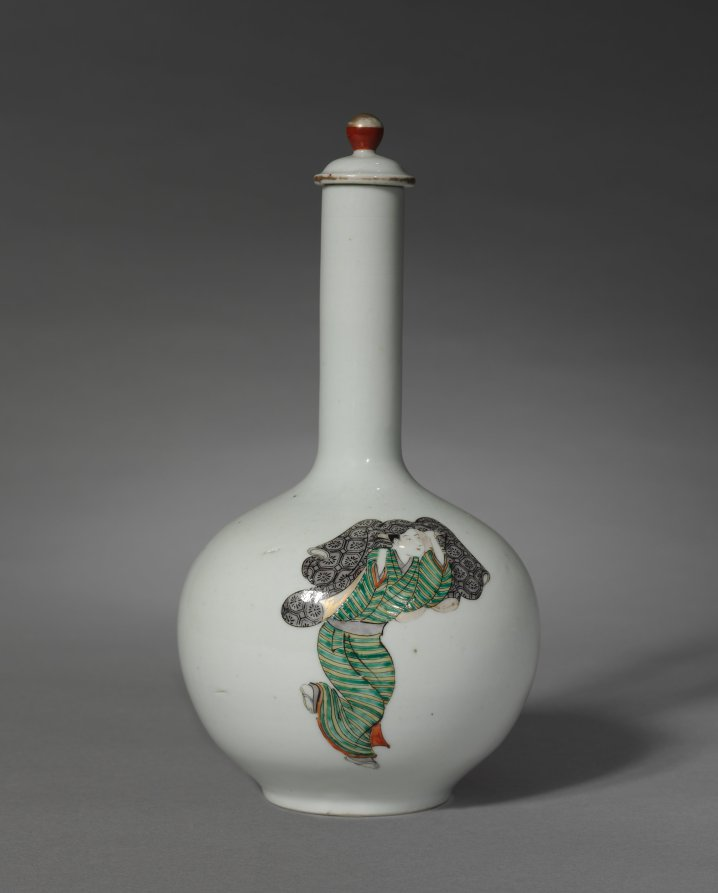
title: Sake Bottle with Three Figures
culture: Japan, Edo period (1615–1868)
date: late 1700s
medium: porcelain with overglaze enamel and gold decoration (Hizen ware, Arita type)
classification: Ceramic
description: The bottle features three elegantly drawn figures: a beautiful woman, a young man, and a priest. The artist used a fine-haired brush to draw these figures in colored enamel onto the porcelain bottle, which had already been given a clear glaze. A final firing fused the enamel to the form. The name derives from the port of Imari from where Japanese porcelains were shipped to other cities in Japan, China, and Europe.